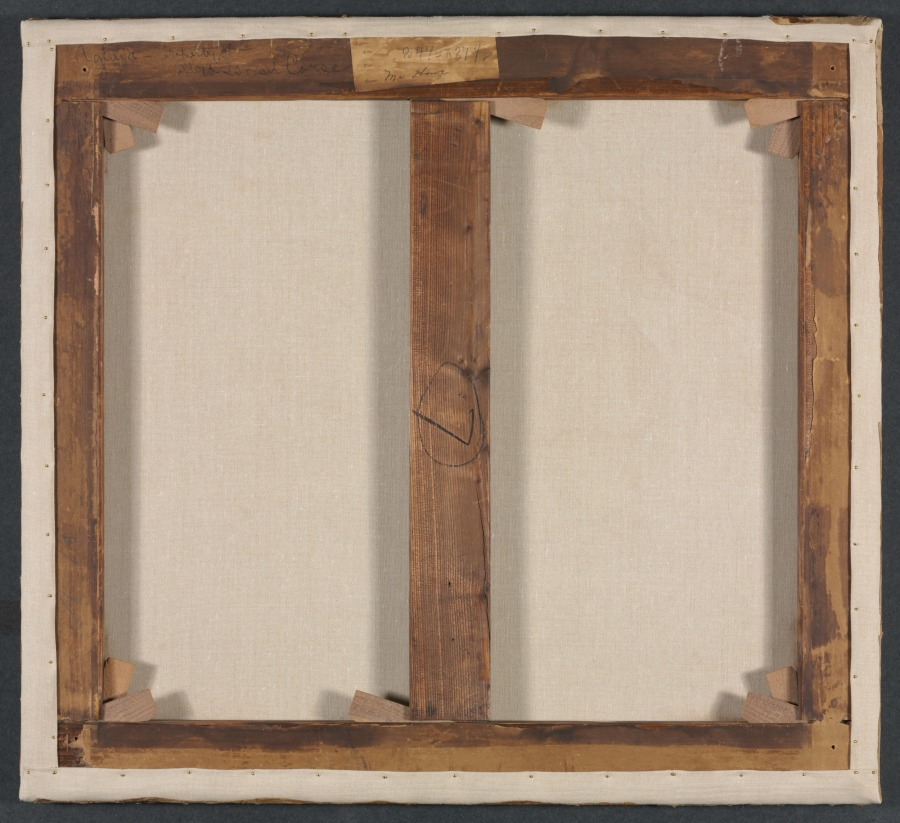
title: Aglaida and Boniface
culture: France, 19th century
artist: Alexandre Cabanel (French, 1823–1889)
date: c. 1857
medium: oil on canvas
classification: Painting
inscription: Signed lower right: "Alex Cabanel"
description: The French painter Alexandre Cabanel was a favorite of Emperor Napoleon III and a leader of the academic style that emphasized precise drawing and smoothly modeled forms. This painting depicts the wealthy Roman woman Aglaida and her concubine slave Boniface, here living as pagan sinners in Rome around 290 CE. On a trip to Tarsus on the Anatolian coast, Boniface converted to Christianity and was tortured and beheaded. Aglaida also converted to Christianity, gave all her possessions to the poor, and built a church for Boniface's relics.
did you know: Alexandre Cabanel was a leader of the academic artists who rejected the paintings of Édouard Manet and other "realists" from the Salon of 1863, producing a vast outcry that forced the government to organize the alternative Salon des Refusés.